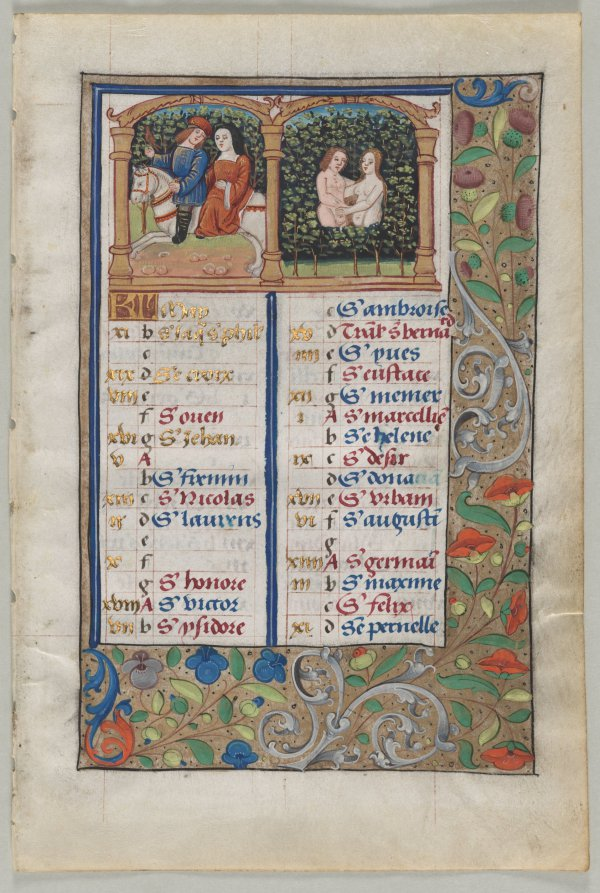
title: Leaf from a Book of Hours: Calendar Page for May (recto)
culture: France, Rouen, 16th century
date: c. 1510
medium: ink, tempera and liquid gold on vellum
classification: Manuscript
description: This calendar page from a book of hours shows the month of May with an illumination of the labor of the month, falconry, the popular medieval sport of hunting with a trained bird of prey. A couple rides through the forest, a falcon on the man’s outstretched arm. May is also associated with fertility rites, and the next scene shows the amorous couple on a break from the hunt. Below are saint days honored in May. May 5th’s inclusion of Saint Audoennus, who was popular in Rouen, helps indicate that this book was made for use in that city.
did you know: It is believed that medieval men and women read their books of hours aloud, not silently.